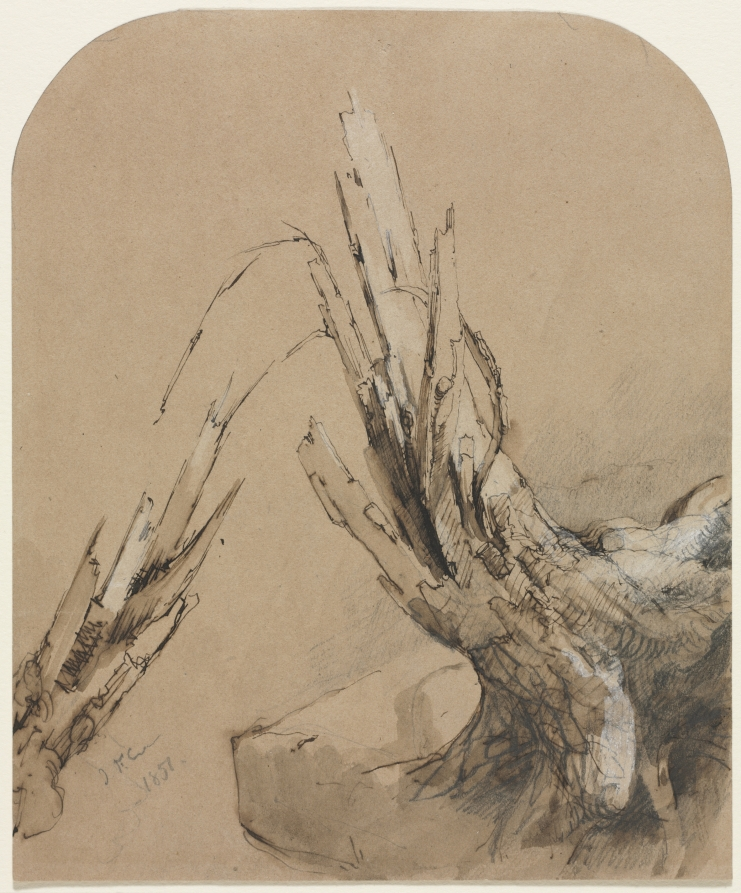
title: A Blasted Tree (recto)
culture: America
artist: Jasper F. Cropsey (American, 1823–1900)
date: 1851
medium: pen and brown ink, brown wash and graphite, heightened with white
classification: Drawing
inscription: signed, lower left, in graphite: J. F. C. / 1851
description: This detailed drawing of a blasted tree was a study for Cropsey’s painting The Cove--A Storm Scene in the Catskill Mountains (1851).